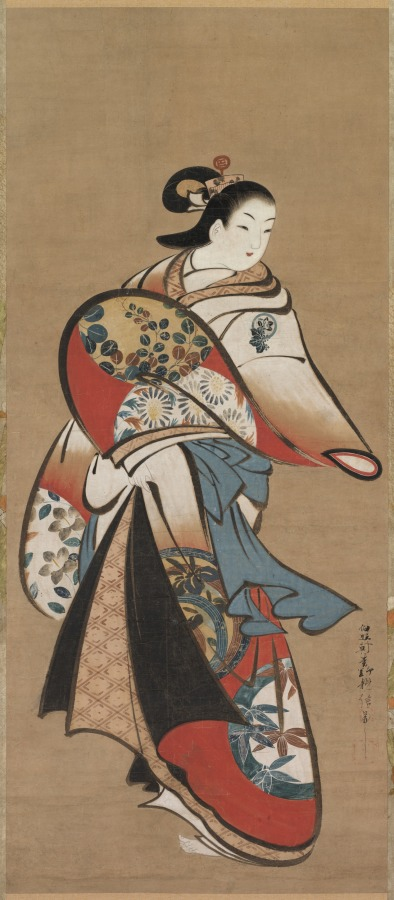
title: Courtesan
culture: Japan, Edo period (1615–1868)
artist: Matsuno Chikanobu (Japanese, active 1716–35)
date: 1716–35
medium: hanging scroll; ink and color on paper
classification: Painting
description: A glamorous courtesan sports an outer robe decorated with large roundels featuring plant motifs including iris and bush clover. Little is known about the life and artistic training of the painter Matsuno Chikanobu, an ukiyo-e artist who painted in a style strongly reminiscent of that of the Kaigetsudō studio. Many of his known paintings are on silk, and executed with high quality pigments, indicating that his primary clientele were wealthy individuals.